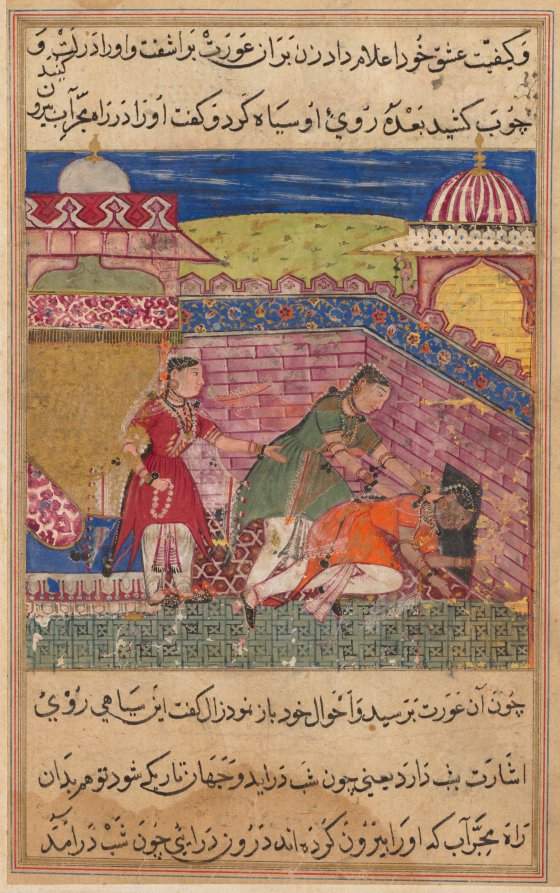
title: The deceitful wife ejects the procuress after blackening her face, from a Tuti-nama (Tales of a Parrot): Eighth Night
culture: Mughal India, court of Akbar (reigned 1556–1605)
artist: Shravana (Indian, active 1550s–c.1600)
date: c. 1560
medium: gum tempera, ink, and gold on paper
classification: Painting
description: The lover of the unfaithful wife sent a female messenger to arrange for their rendezvous. In a false display of horror, the wily adulteress blackened the face of the messenger as though to disgrace her and threw her out of the house, ordering her to be dumped by the side of a canal. That act, however, was a coded message to her lover to meet at the dark of night at that same location. The Indian artist Shravana added the pink brick wall to lend a sense of depth and dimensionality to the scene.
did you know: The striped dome and yellow bricks are vestiges of an earlier style of painting.